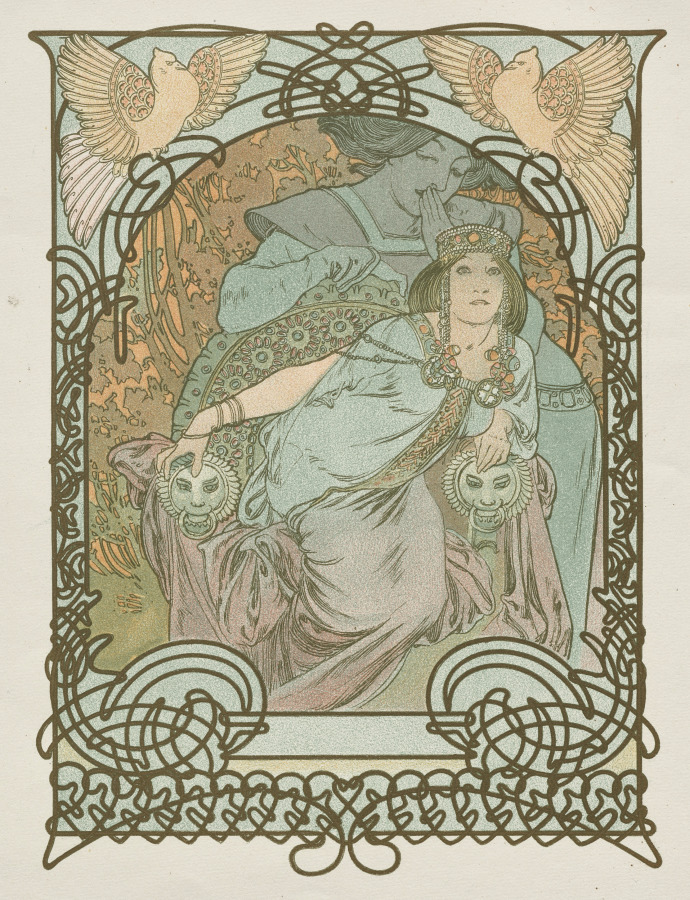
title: Ilsee, Princesse de Tripoli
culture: Czechoslovakia, 19th century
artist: Alphonse Mucha (Czech, 1860–1939)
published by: by Robert de Lfers, published by H. Piazza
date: 1897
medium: color lithograph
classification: Print